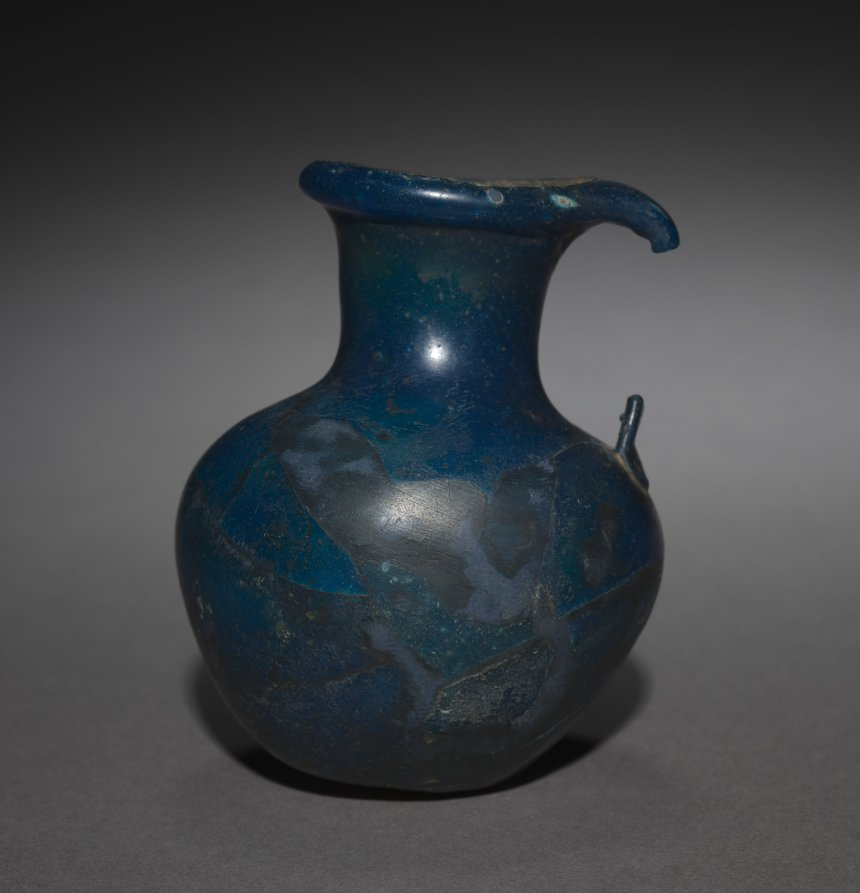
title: Long-Necked Flask with Strap Handle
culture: Egypt, New Kingdom (1540–1069 BCE), Dynasty 18, reign of Amenhotep III (1390–1352 BCE) or later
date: 1391–1353 BCE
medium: glass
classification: Vessels